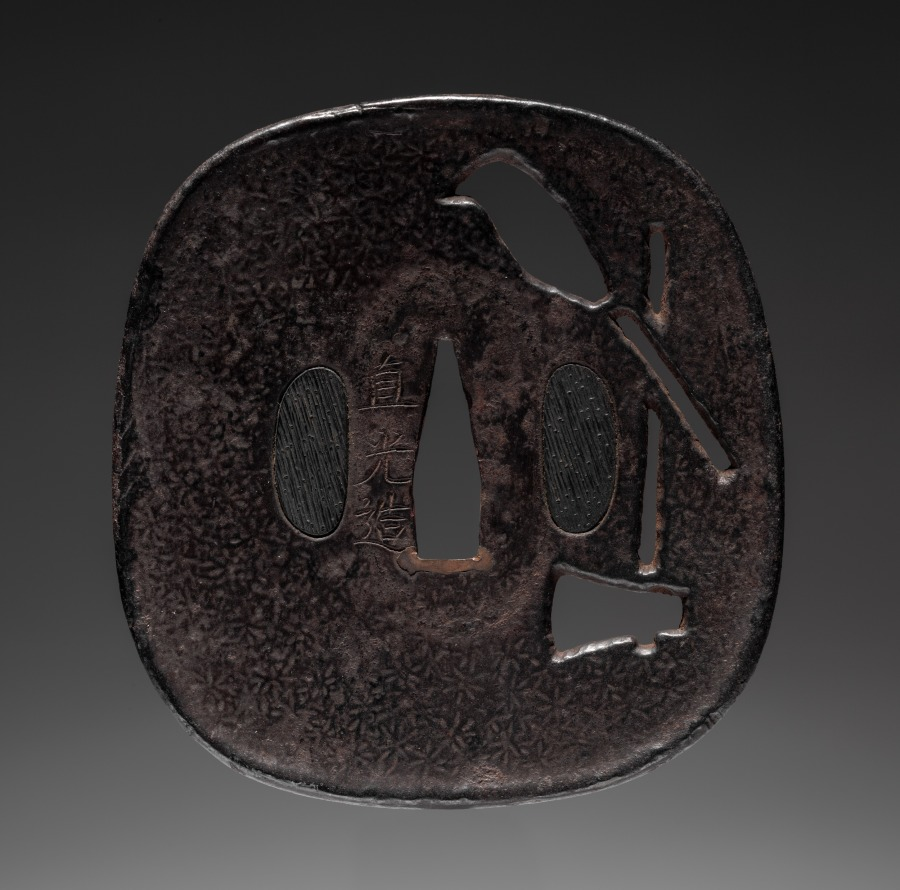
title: Sword Guard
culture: Japan, Edo period (1615–1868)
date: late 1700s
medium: iron (Myochin type)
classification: Arms and Armor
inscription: signed "Naomitsu made."